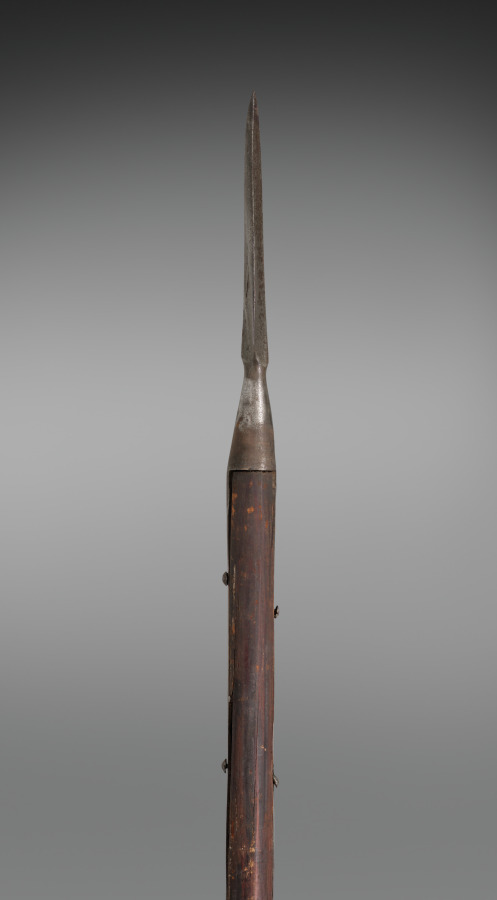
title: Pole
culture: Spain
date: 1700s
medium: wood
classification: Arms and Armor